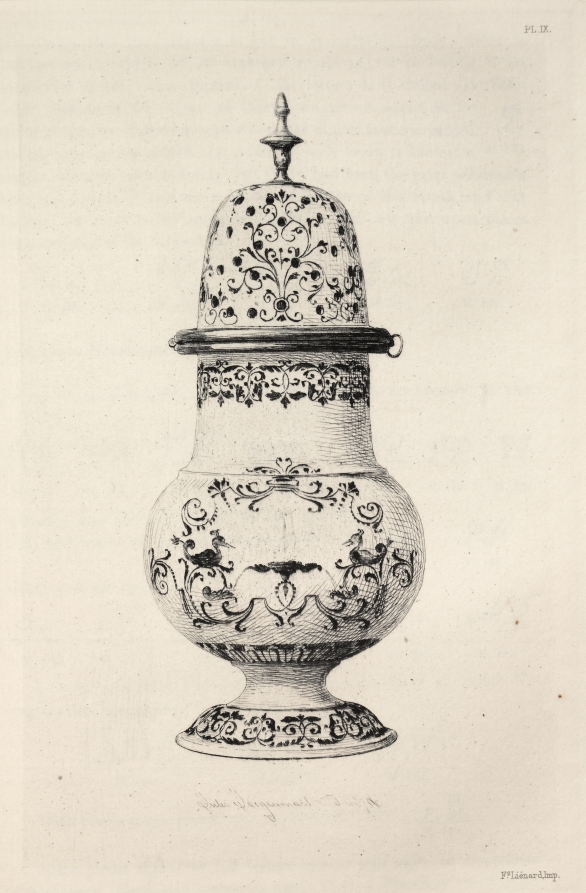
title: History of the Ceramic Art: A Descriptive and Philosophical Study of the Pottery of All Ages and All Nations: France: Moustieres- Sugar Caster, Blue Decoration (Plate IX)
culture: France, 19th century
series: Book by Albert Jacquemart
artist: Jules Jacquemart (French, 1837–1880)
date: 1877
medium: etching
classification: Bound Volume